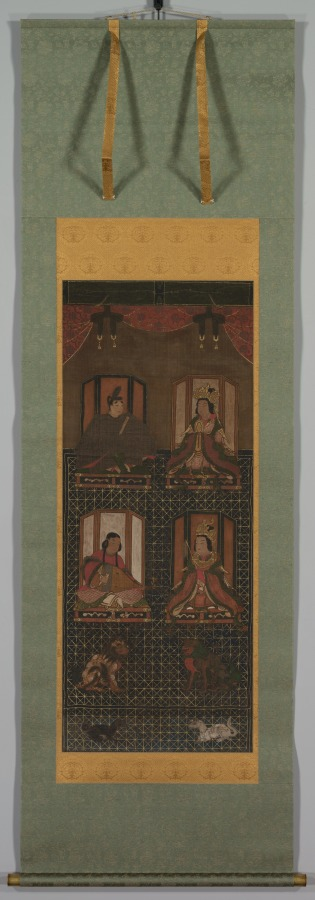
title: Mandala of the Four Deities of Mt. Kōya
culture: Japan, Muromachi period (1392–1573)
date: 1500s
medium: hanging scroll, ink, color and cut gold foil on silk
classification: Painting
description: The two kami, or deities, at the top of this painting are Kariba Myōjin and Niu Myōjin. They inhabit Mount Kōya and are described as son and mother. They are shown here as courtiers, with Kariba in Japanese-style court robes and Niu in robes modeled after court garments of the Tang dynasty. The two kami seated beneath are Kehi Myōjin, portrayed as a lady holding a whisk, and the youthful Miyajima Myōjin, with his hair drawn up in loops, playing a lute (biwa). Hōjō Masako (1157–1225), the wife of the first Kamakura shogun (leader) Minamoto Yoritomo (1147–1199), invited them to Mount Kōya.